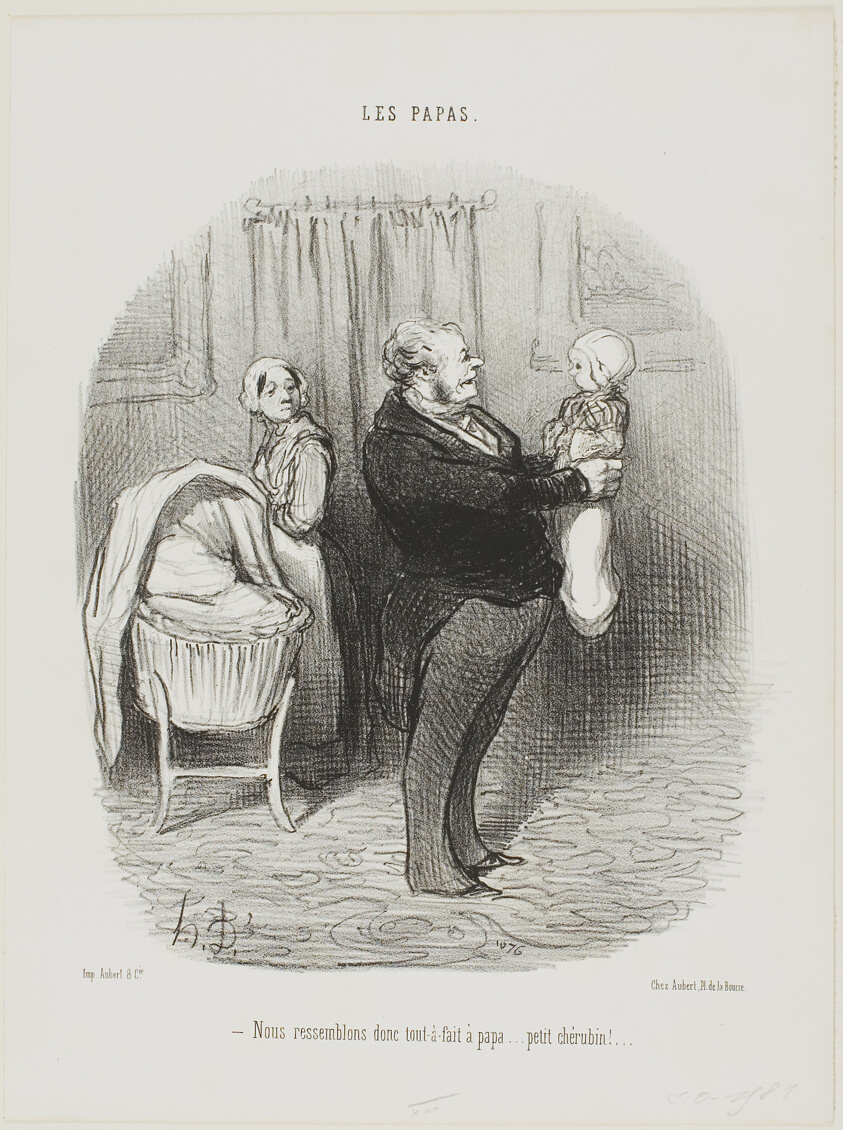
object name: Print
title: “- We really look like Papa, don't we... little Cherub!,” plate 14 from Les Papas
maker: Honoré Victorin Daumier; French, 1808-1879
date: 1847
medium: Lithograph in black on white wove paper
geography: France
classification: lithograph; print; prints and drawing